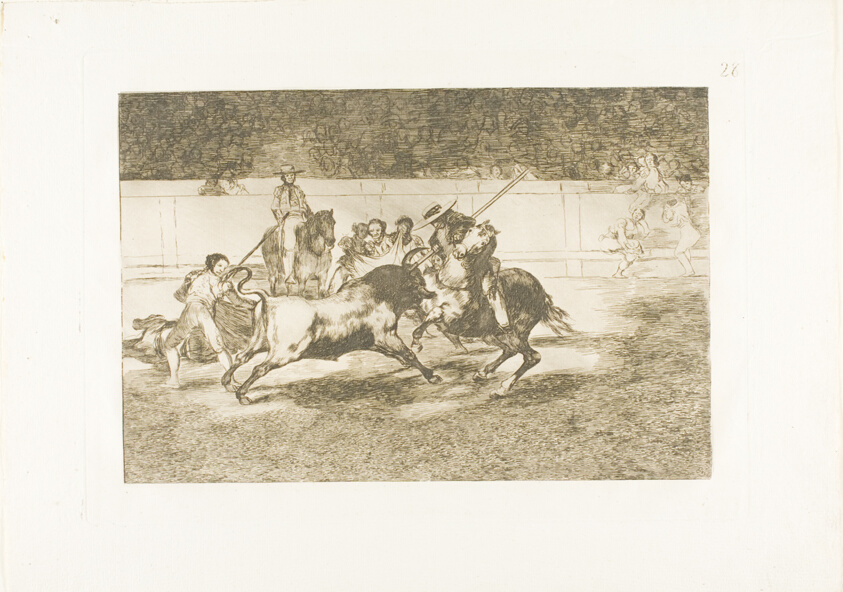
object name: Print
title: The Forceful Rendón Stabs a Bull with the Pique, from which Pass He Died in the Ring at Madrid, plate 28 from The Art of Bullfighting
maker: Francisco José de Goya y Lucientes (Spanish, 1746-1828)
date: 1814/16, published 1816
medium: Etching, burnished aquatint and burin on ivory laid paper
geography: Spain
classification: etching; print; prints and drawing